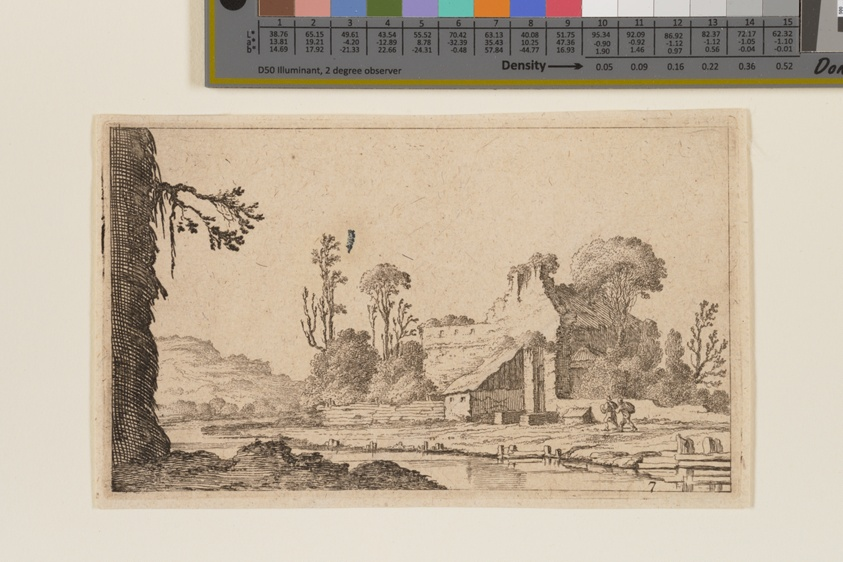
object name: Print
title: Ruins Transformed into a Farm on a River, from Twelve Landscapes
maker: Gillis van Scheyndel (Dutch, 1595–1660)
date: c. 1605-1650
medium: Etching on ivory laid paper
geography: Netherlands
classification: etching; paper; print; prints and drawing